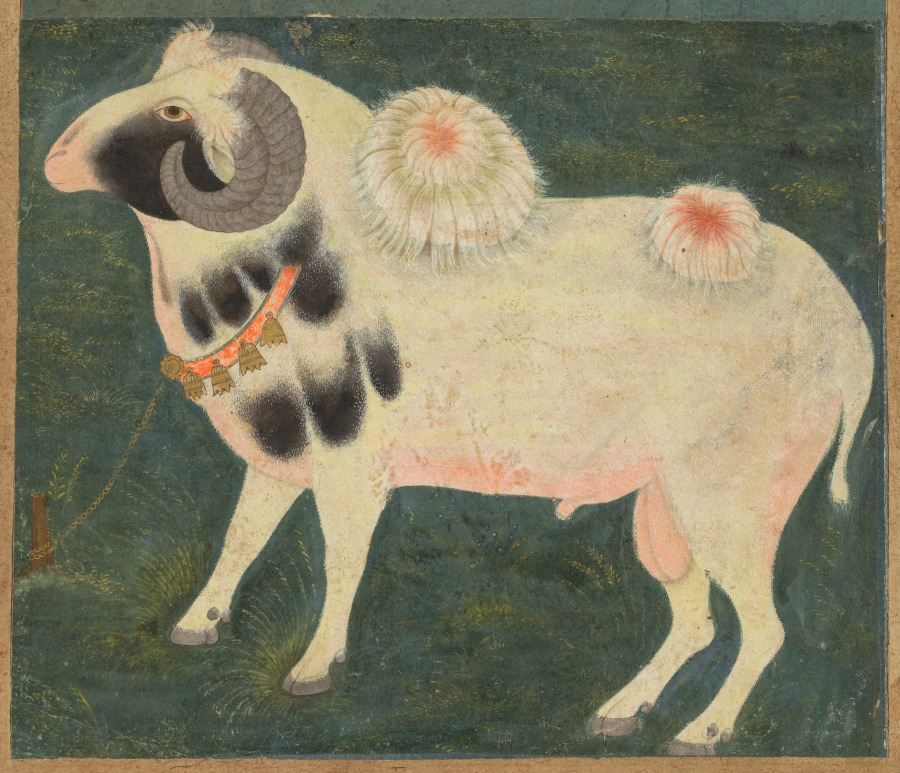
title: A royal ram with a gold chain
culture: India, Mughal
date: c. 1585; border added probably 1700s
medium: Gum tempera and gold on paper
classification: Painting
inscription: Urdu inscription at top, in nasta‘liq script: sheep; Hindi inscription under left corner of painting, in devanagari script: Shri 6; Hindi inscription below painting, in devanagari script: 2, sheep; Hindi inscription, bottom center, in devanagari script: 674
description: The ram in this painting is a particularly well-groomed animal that was probably kept in the royal menagerie and attended to by special keepers. The puffs of hair on the ram’s back have been colored with henna, and he wears a decorative chain of bells across his chest. The Mughal rulers collected and exhibited specimens of various animals from their territories out of a scientific interest as well as a desire to display the extent of their influence over the land and its inhabitants.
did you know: Sheep with black and white markings like this are called Jacob sheep.